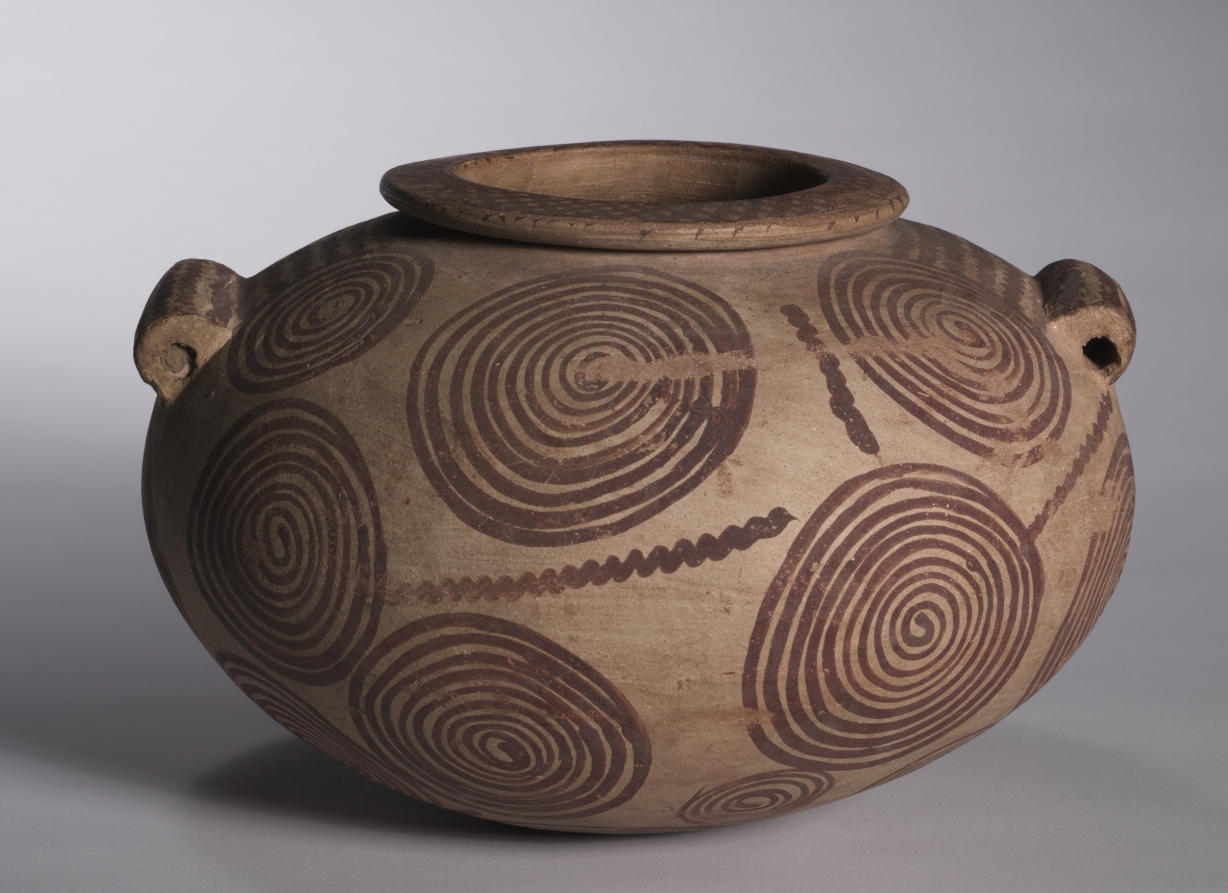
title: Squat Jar with Lug Handles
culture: Egypt, Predynastic (5000–2950 BCE), Naqada IIb (3650–3300 BCE)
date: c. 3400–3300 BCE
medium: marl clay pottery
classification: Vessels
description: Buff-colored pottery decorated in red paint is characteristic of the later Predynastic period. The spirals and wavy lines on this jar imitate the appearance of more costly vessels made of hard stones.